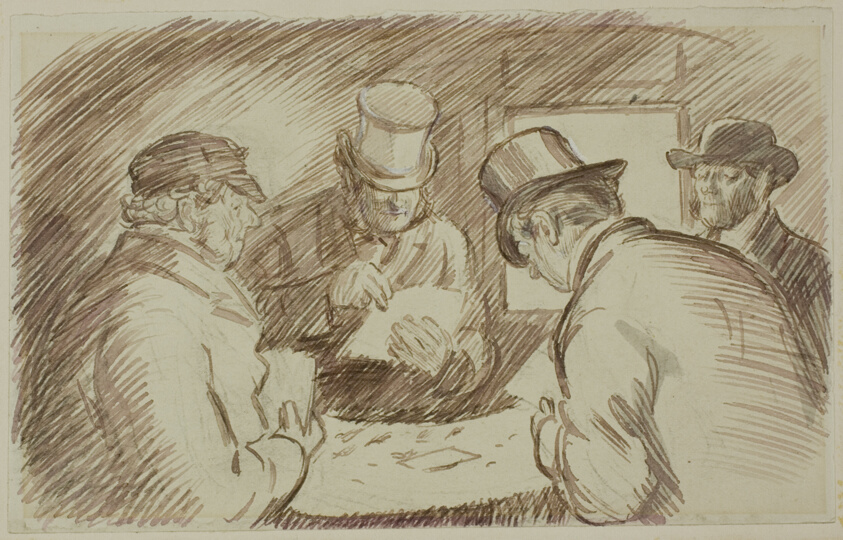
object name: Drawing and Watercolor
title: A Game of Cards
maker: Charles Samuel Keene (British, 1823-1891)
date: 1870/91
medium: Pen and brown ink, with brush and gray wash and touches of white gouache, over black chalk, on cream wove paper, laid down on card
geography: England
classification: pen and ink drawings; drawings (visual works); prints and drawing